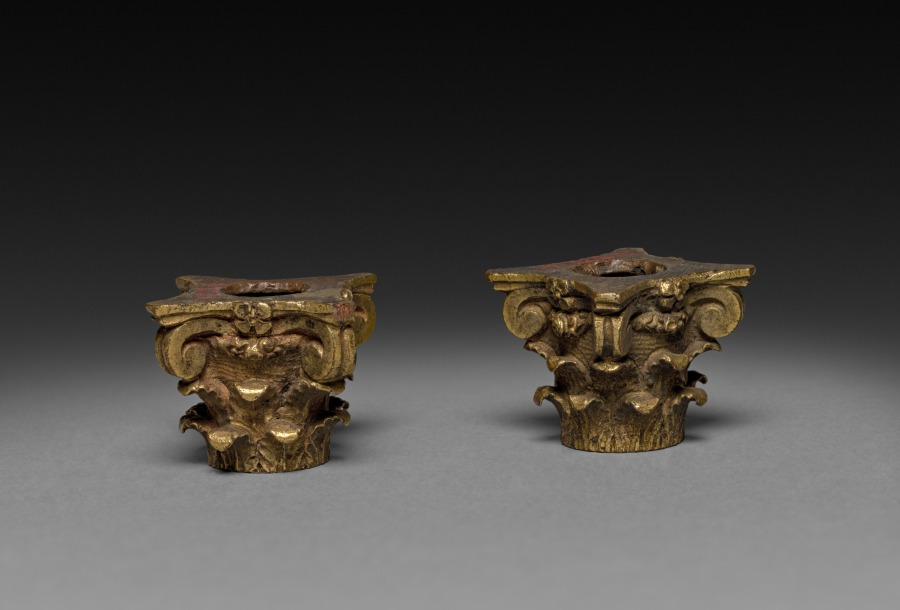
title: Ornamental Capital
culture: France, late 18th century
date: 1775–1799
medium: gilt bronze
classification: Metalwork